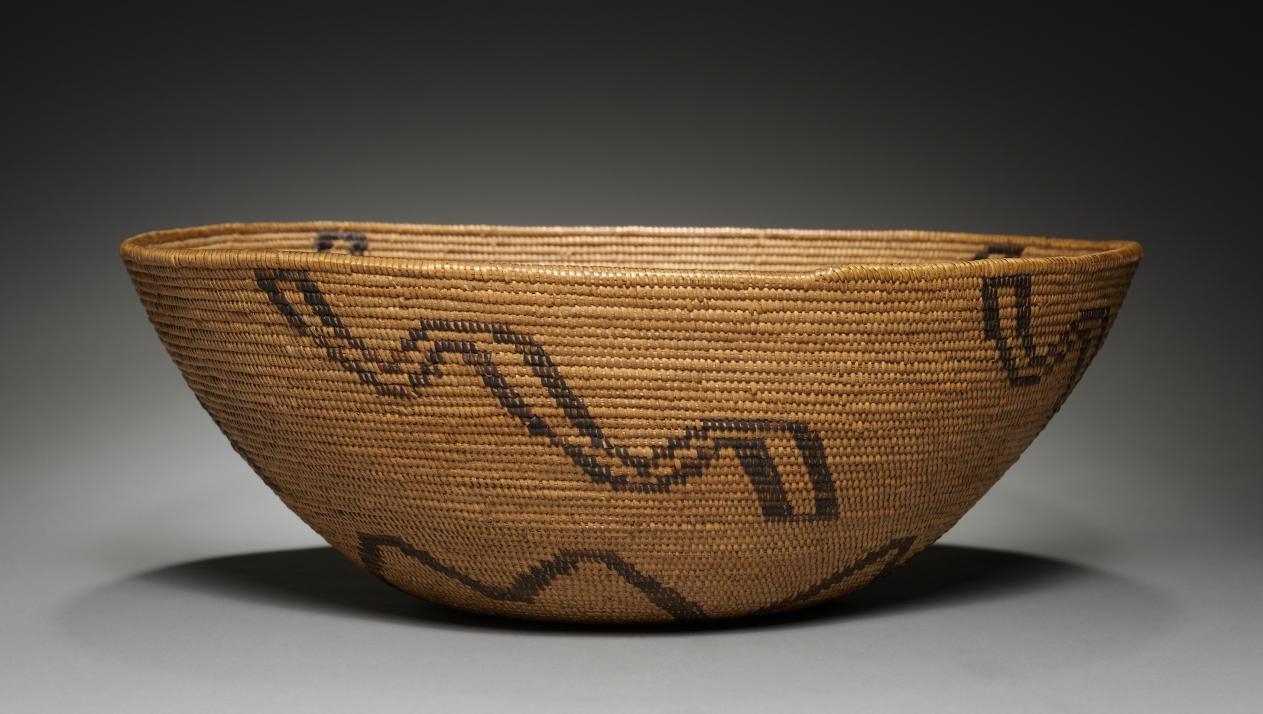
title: Food Bowl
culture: California, Southern, Gabrielino (San Gabriel, Mission or Tongva), Late 19th- Early 20th century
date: c 1875– 1925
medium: coiled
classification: Basketry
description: CMA Bulletin, December 1930